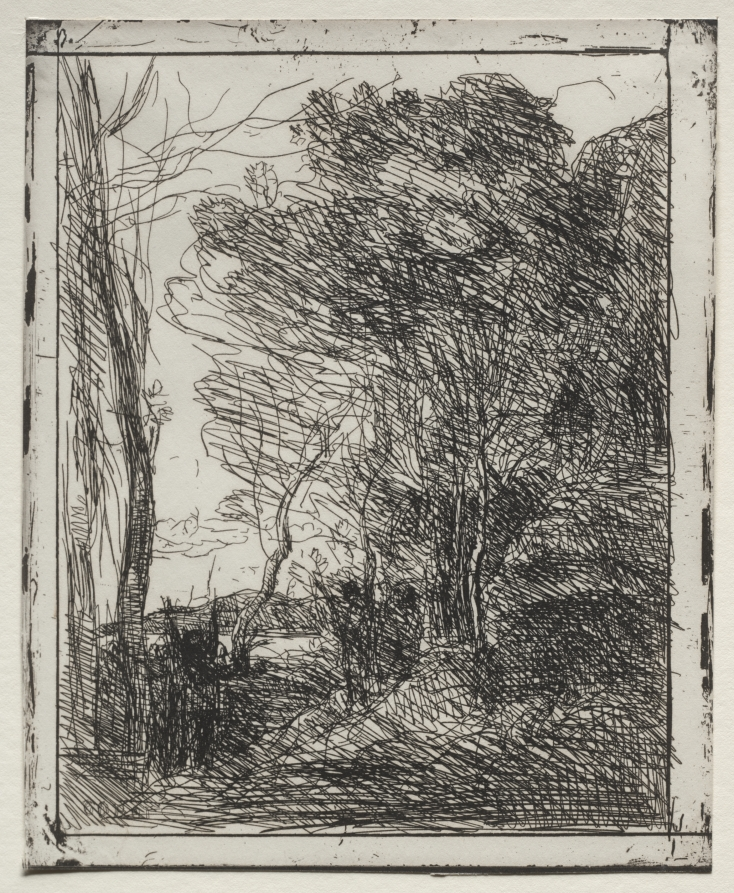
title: The Gallic Round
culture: France, 19th century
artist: Jean Baptiste Camille Corot (French, 1796–1875)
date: original impression 1857, printed in 1921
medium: cliché-verre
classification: Print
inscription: signed, lower left: "COROT" in the glass plate